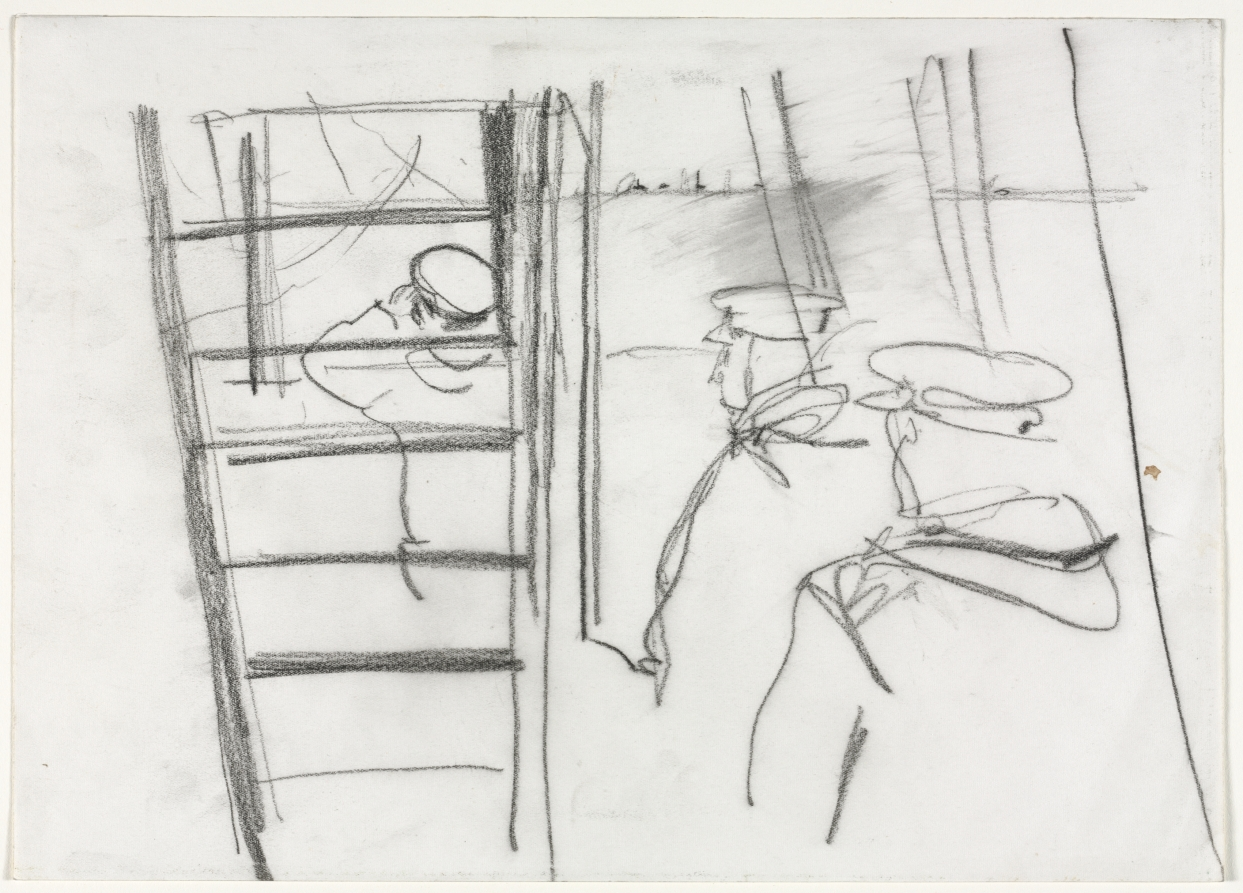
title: On Deck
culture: England, 20th century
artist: Muirhead Bone (British, 1876–1953)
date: c. 1901–40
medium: charcoal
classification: Drawing